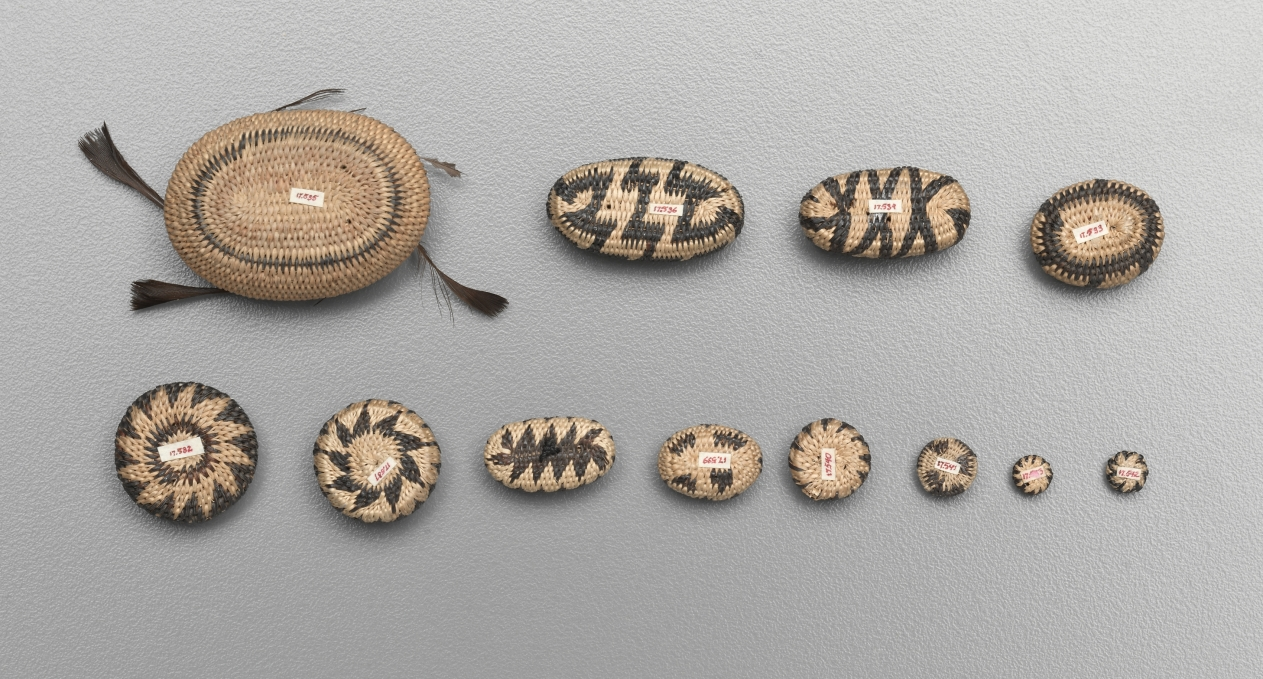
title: Miniature Round Basket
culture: California, Pomo, late 19th-early 20th century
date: late 1800s-early 1900s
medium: plant materials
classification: Basketry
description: Miniature baskets were made to demonstrate the basket-maker’s virtuoso skill, and these tiny marvels seem to be no exception -- the smallest are just a few millimeters wide but still patterned. For such fine work, dexterity was required as much for preparation of materials as for weaving.